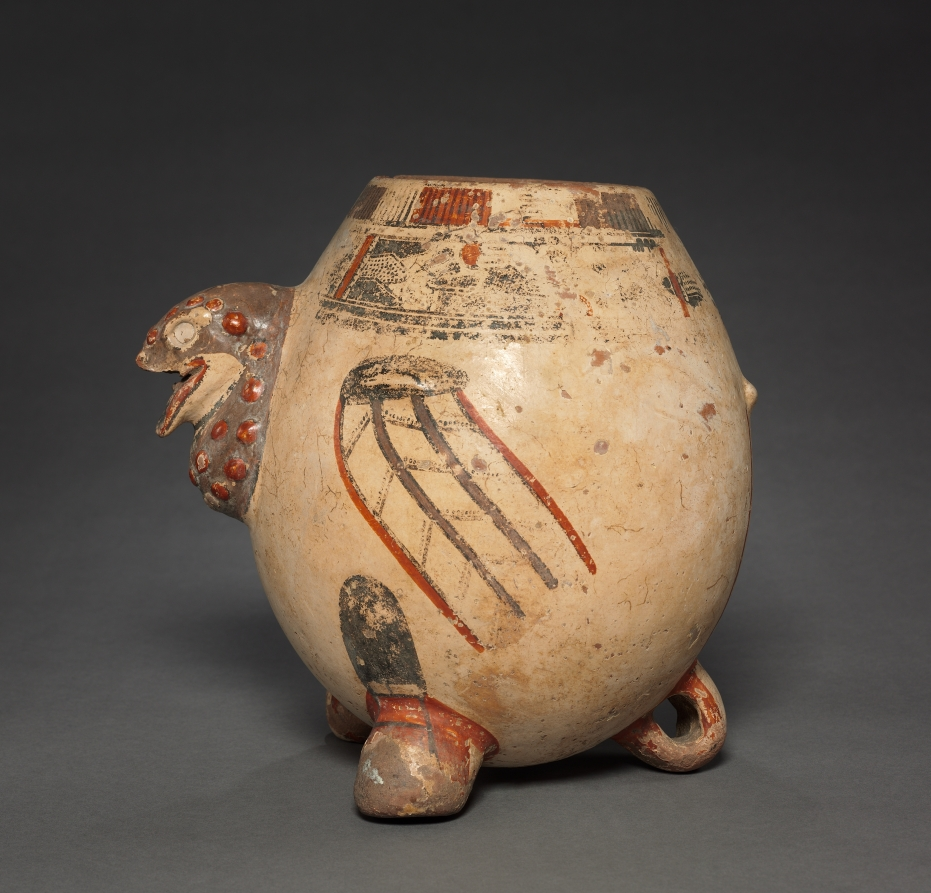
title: Footed Vase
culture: Costa Rica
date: 1000–1550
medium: earthenware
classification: Ceramic